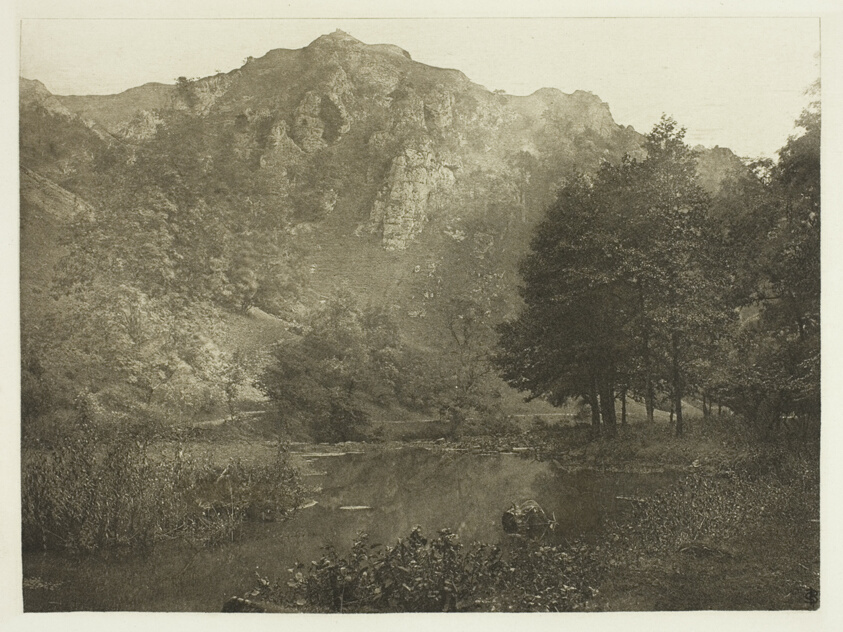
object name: Photograph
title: In Dove Dale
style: 19th century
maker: Peter Henry Emerson (English, born Cuba, 1856–1936)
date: 1880s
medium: Photogravure, plate XLIV from the album "The Compleat Angler or the Contemplative Man's Recreation, Volume II" (1888)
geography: England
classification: photogravure; photomechanical process; photography; photograph